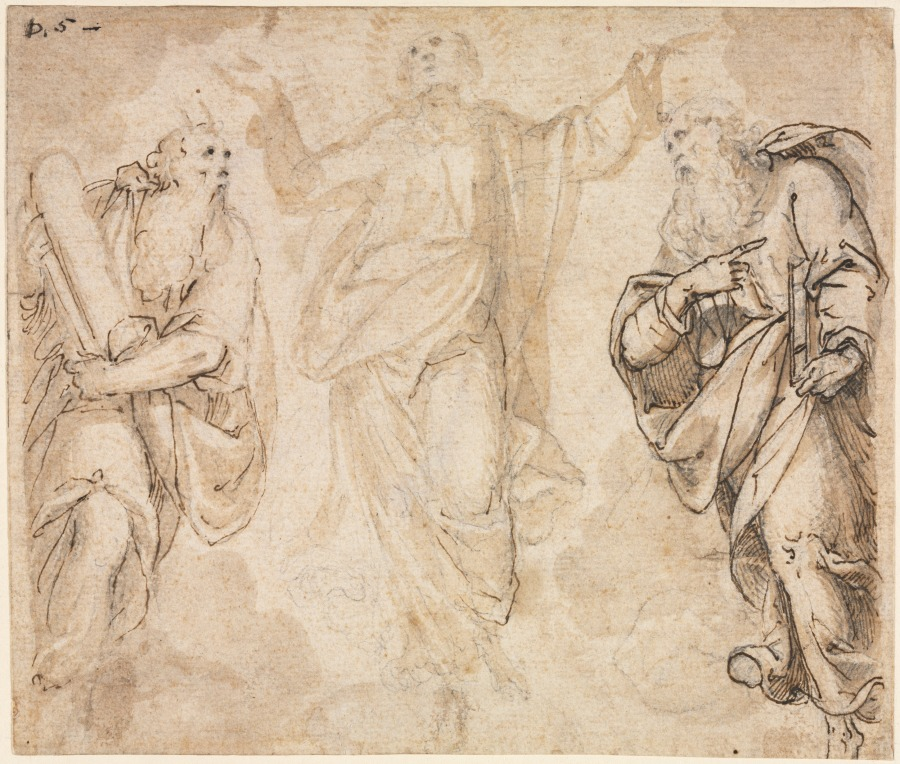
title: The Transfiguration (recto); Study of Hands (verso)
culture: Italy, 16th century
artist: Camillo Procaccini (Italian, 1546–1629)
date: c. 1590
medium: pen and brown ink and graphite and brush and brown wash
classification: Drawing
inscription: recto: upper left, in brown ink: D. 5 - verso: upper center, in brown ink: [illegible, cropped] / 2 ; upper left, in graphite: by Pr[illegible]Ni ; upper left, in pink pencil: .2 ; lower right, in graphite: [STAT?] ; SECONDARY SUPPORT, lower right, in graphite: 00265[2?] [cropped]